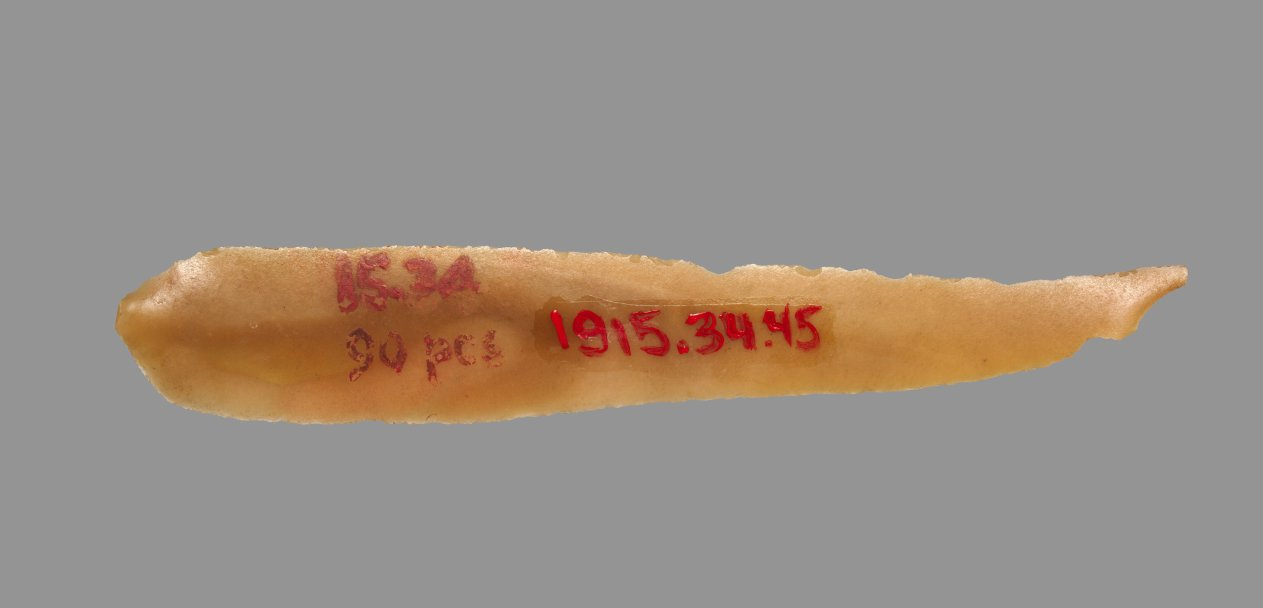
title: Sickle Blade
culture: Egypt, Middle Kingdom (2040–1648 BCE), Dynasty 12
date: 1980–1801 BCE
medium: flint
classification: Implements